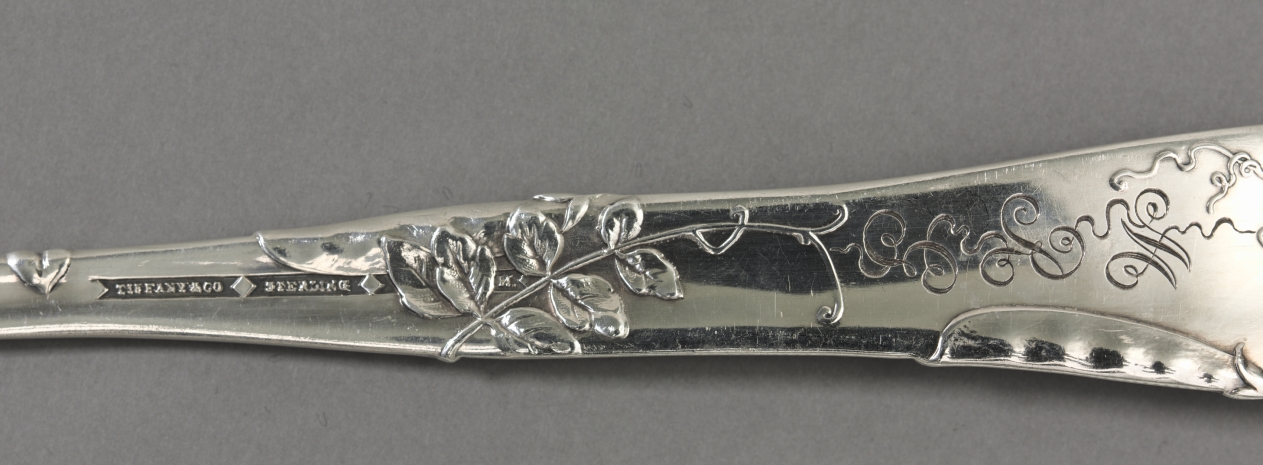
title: Vine Pattern Salad Fork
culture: America, New York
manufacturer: Tiffany & Co. (America, New York, est. 1837)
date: c. 1872–80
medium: silver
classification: Silver